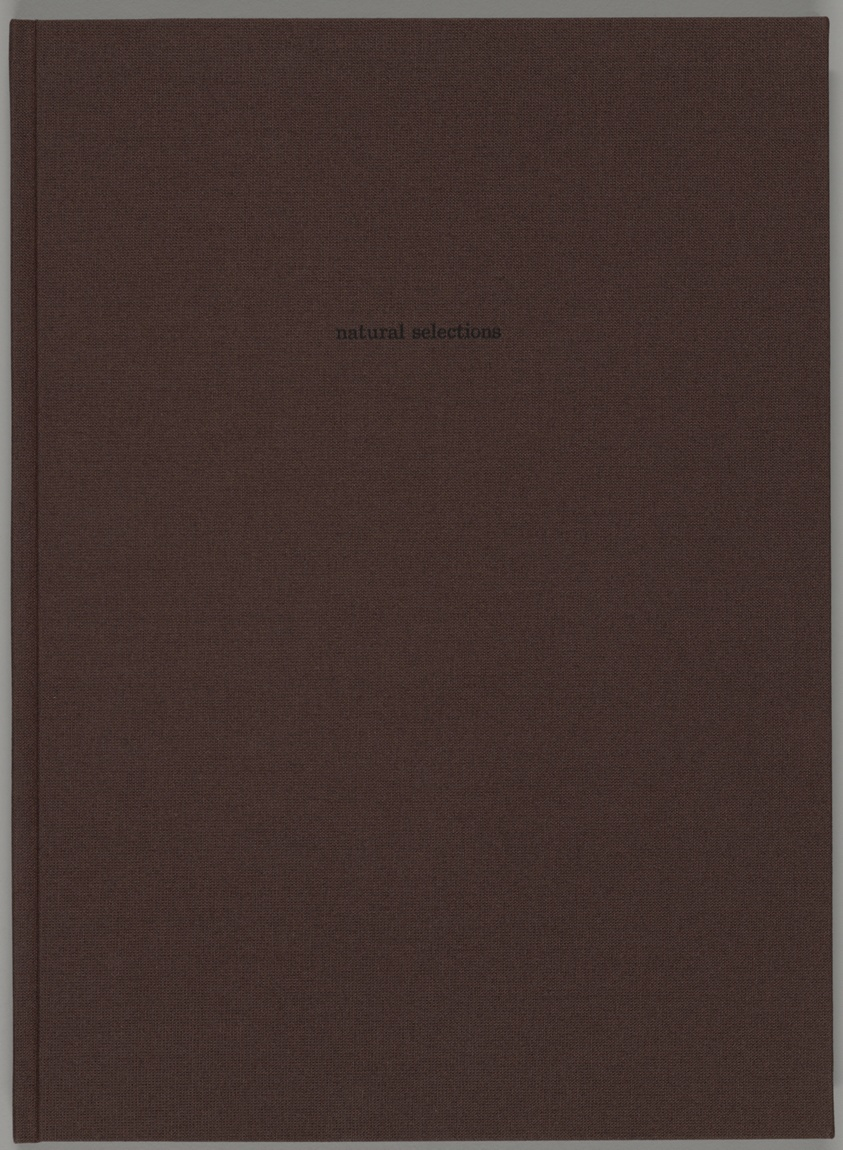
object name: Print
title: Model Draping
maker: Whistler, James McNeill; American, 1834-1903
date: probably 1889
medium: Transfer lithograph in black on cream laid paper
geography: United States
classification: transfer lithograph; lithograph; print; prints and drawing; paper